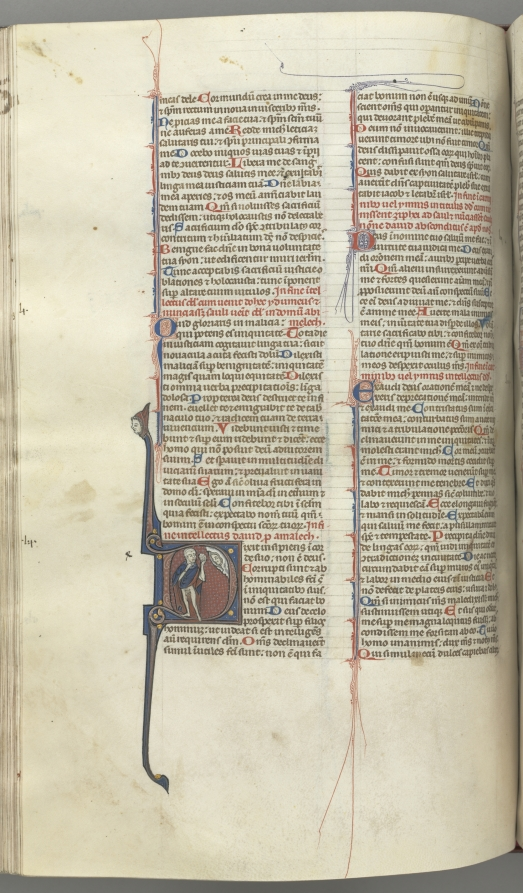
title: Fol. 222v, Psalm 52, historiated initial D, a fool naked but for a cloak, holding a bladder, bust of God above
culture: Southern France, Toulouse(?), 13th century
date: c. 1275–1300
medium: ink, tempera and gold on vellum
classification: Bound Volume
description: Biblical manuscripts were highly prized and important possessions of churches, monasteries, cathedral schools, and universities throughout medieval Europe. The biblical texts were known as the vulgate, the translations made by Saint Jerome in the fourth century from Hebrew and Greek into Latin, which became the definitive and official Latin version of the Roman Church. In the 13th century, the bible was, for the first time, produced as a single volume with an officially sanctioned sequence to its books and chapters as illustrated by this example. The very extensive decoration of this bible is arranged hierarchically to indicate the relative importance of the various texts so that full or almost full-page initials mark the openings of the first prologue, Genesis, and the first Gospel; historiated initials mark the beginning of each book and illuminated initials mark the Prologues.